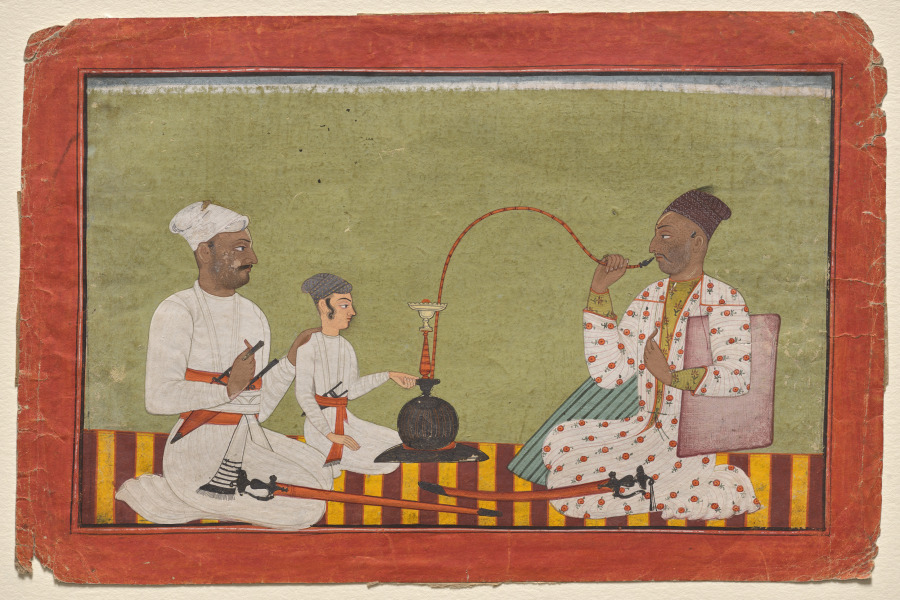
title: Posthumous portrait of Raja Chhatar Singh of Chamba smoking a hookah with his brother and son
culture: Northern India, Pahari kingdoms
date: c. 1700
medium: Gum tempera and ink on paper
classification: Painting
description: King Chhatar Singh (reigned 1664–90), his thinning facial hair shot through with gray, points to his heart, a gesture common in images of the deceased. With his right hand he grasps the pipe of a hookah, connecting him to his son Udai Singh, who holds the rim of its base. The king’s sword points directly to the boy, further linking them visually. Since hookah smoking connoted elite royal status in Pahari portraiture, this image suggests the passing of power from father to son.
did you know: The back of this painting is lined with reused ledger paper.